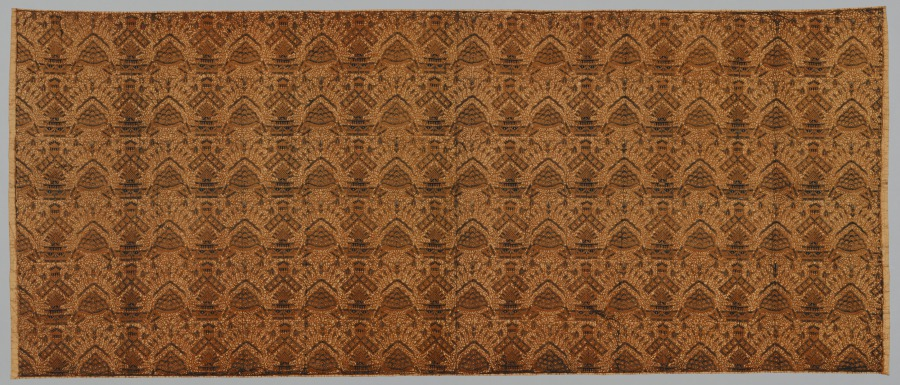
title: Wearing Cloth (Kain Pajang)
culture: Indonesia, Central Java, 20th century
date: 1900–1955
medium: resist printed cotton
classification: Textile